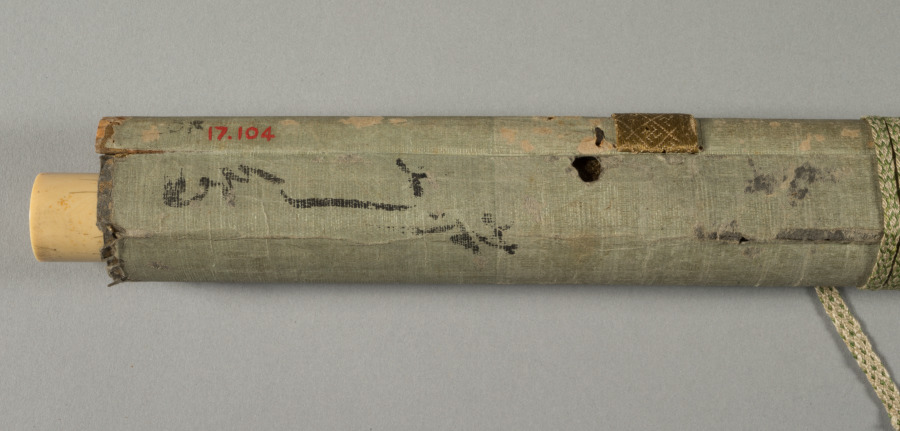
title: Ducks and Reeds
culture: Japan, Momoyama period (1573-1615) to Edo period (1615-1858)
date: early 1600s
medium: hanging scroll; ink on paper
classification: Painting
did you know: This painting was produced by a member of the Kano school.